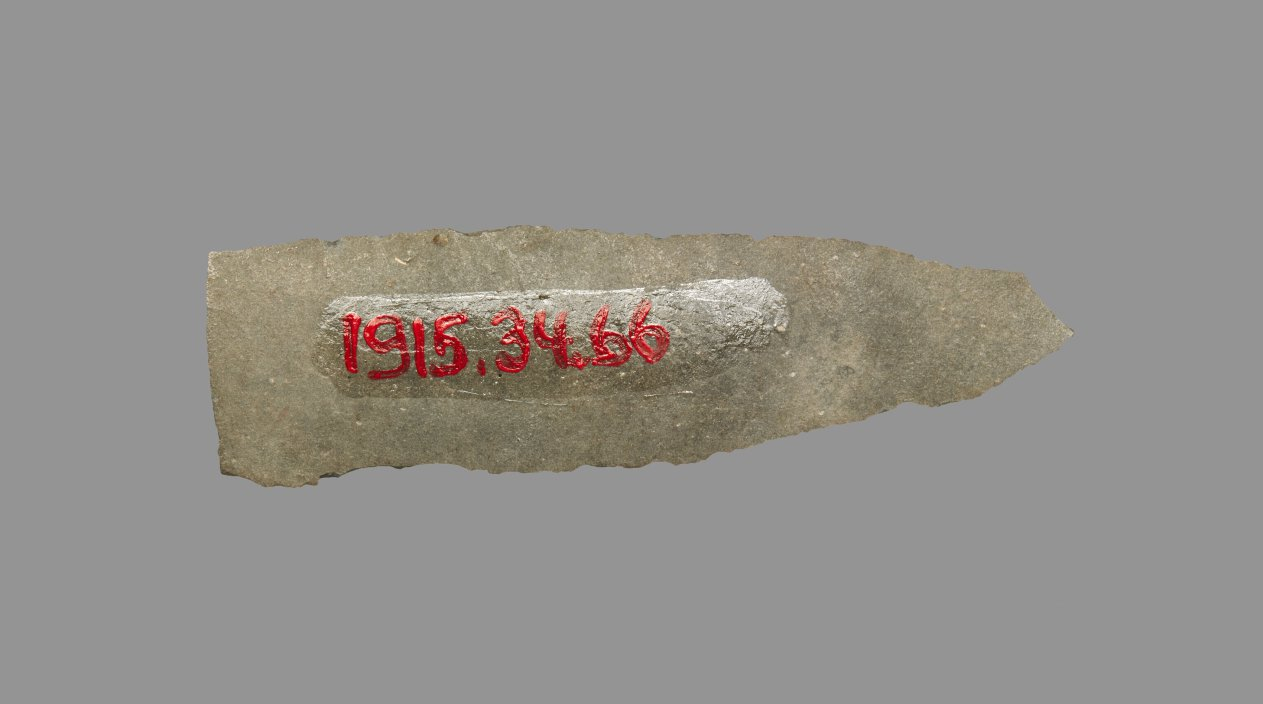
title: Sickle Blade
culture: Egypt, Middle Kingdom (2040–1648 BCE), Dynasty 12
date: 1980–1801 BCE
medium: flint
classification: Implements